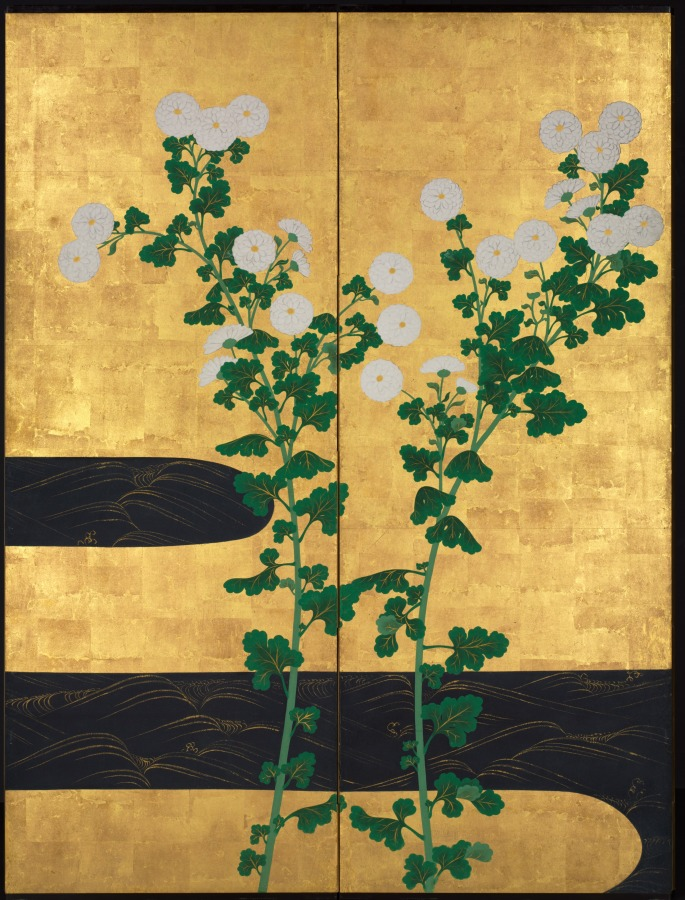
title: Chrysanthemums by a Stream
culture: Japan, Edo period (1615–1868)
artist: possibly by Ogata Kōrin (Japanese, 1658–1716)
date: c. 1715–30 or after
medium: One of a pair of six-panel folding screens; ink and color on gilded paper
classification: Painting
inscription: the signature and seal of Korin, "sensen mappa (makko) inshi hokyo Korin" (late generation hermit of the Kamo stream tradition) is written in two lines. A circular seal which reads "Hoshuku" is at the end of the second line on the edge of the first panel from the right.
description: These screens recall a painting style so closely identified with Ogata Kōrin (1658–1716) that it is called Rinpa, or “Rin School,” after the ideograph “rin” in his name. The highly stylized background accentuates floral groupings that have been groomed so as to appear utterly artificial, like the synthetic arrangements available today. Kōrin's genius derived in large measure from natural phenomena painstakingly observed and then manipulated to create compositions of startling refinement and sparkling isolation. This process may have grown out of Kōrin's early immersion in the family textile business, a medium that encourages such dramatic distillations of form: the stream's gold-crested waves bring to mind traditional kimono robe designs of Kōrin's era. Works with the signature seen on this painting, including a style name, or persona suggested to Kōrin by his brother Kenzan (1663–1743), are sometimes considered to have been produced either in the last year of his life, when he was very ill, or after his death. In both scenarios, the lion’s share of the work would have been done by studio assistants, but little is truly known of his studio practice. Given the regularity of the gold waves on the stream, and the tension in the arrangement of the chrysanthemums, it is also possible that the screens were made in emulation of Kōrin's designs by a later artist.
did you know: The signature used on these screens may indicate paintings made in the last year of the artist's life, or works completed by his studio after his death.